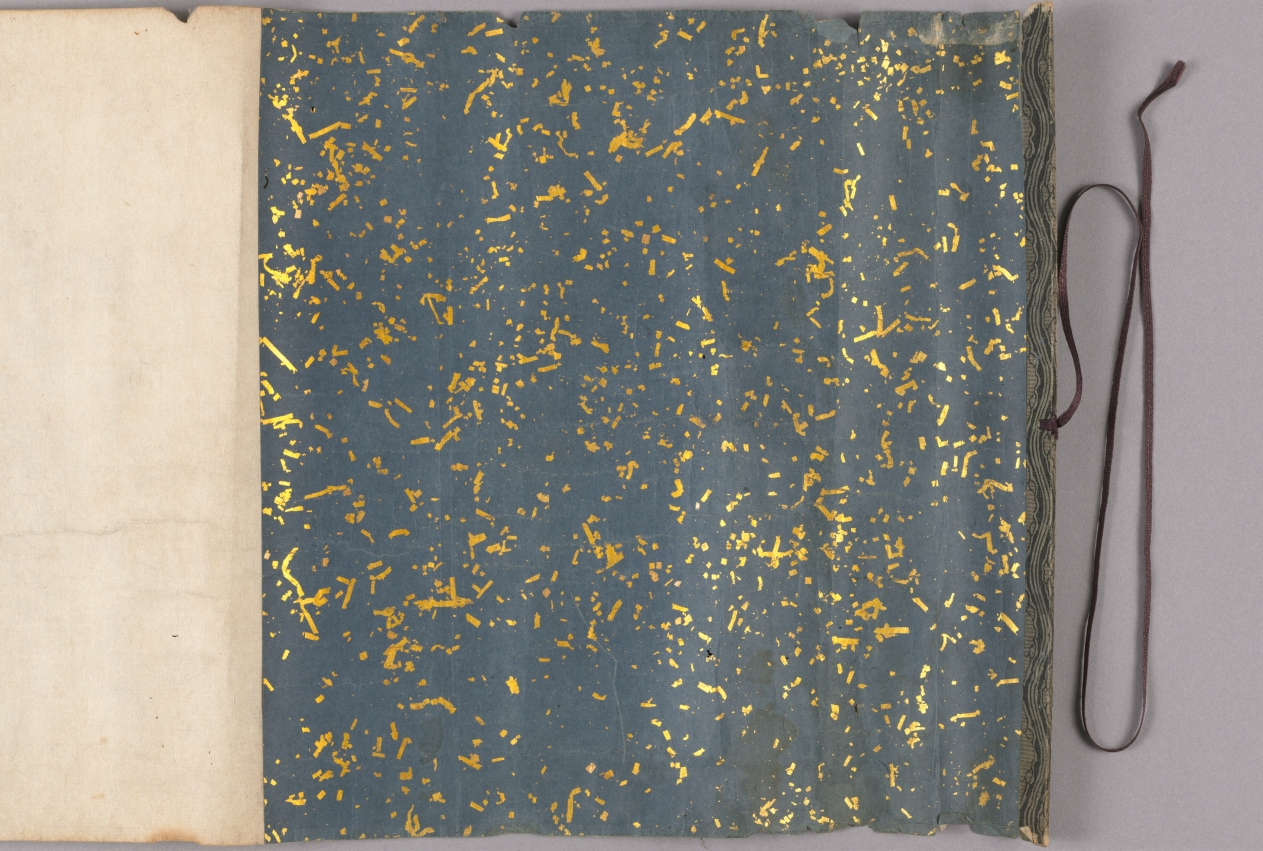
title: Chinese Seals and Poets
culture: Japan, Edo period (1615–1868)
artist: Hosokawa Rinkoku (Japanese, 1779–1843)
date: 1842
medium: handscroll; ink and color on paper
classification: Painting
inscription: Eight seal impressions are painted in red and alternate with sketchily painted figures. Artist's colophon at end of scroll.